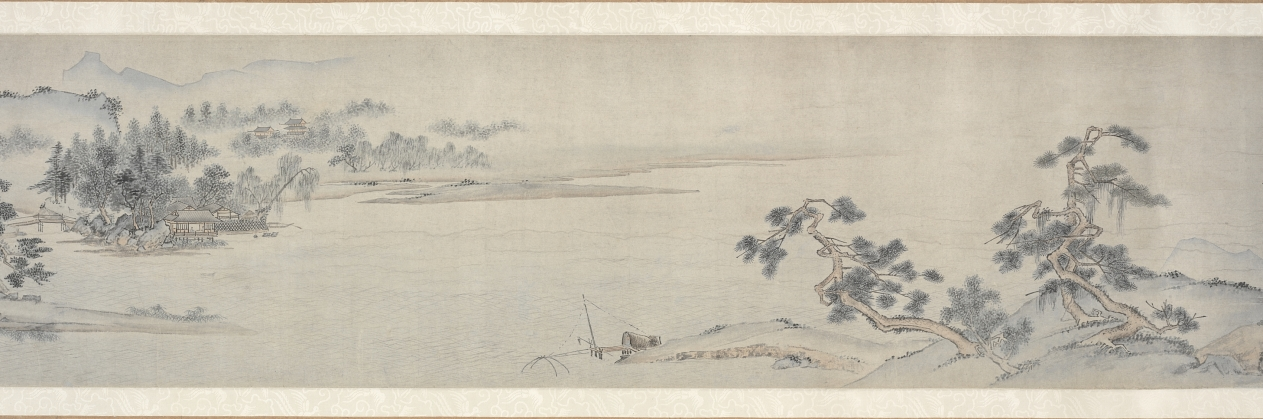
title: Ten Thousand Li of the Yangzi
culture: China, Ming dynasty (1368–1644)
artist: Dai Jin (Chinese, 1388–1462)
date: c. 1400s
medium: Handscroll; ink and color on paper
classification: Painting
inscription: Two colophons at end. Artist's seals: Dai Jin 戴進 and Wenjin 文進.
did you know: Dai Jin is traditionally considered the founder of the Zhe School, a style of landscape painting.